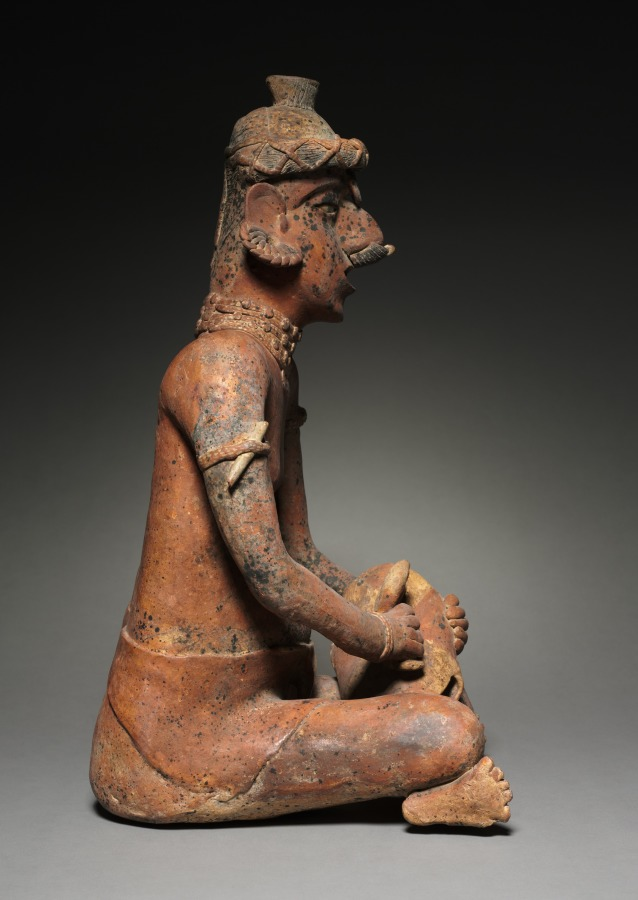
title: Male Seated Figure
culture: Mexico, Nayarit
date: 100 BCE–300 CE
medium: ceramic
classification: Ceramic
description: This couple-extremely fine examples of their kind-may commemorate the marriage of an important person, such as a chief, but could also represent siblings of a chiefly family. Whatever their relationship, their unity is conveyed by their physical similarities, including their jewelry, which marks high social station. The female is unusual in nursing an infant, likely a reference to generational renewal and the continuation of noble bloodlines. The significance of the male’s activity-beating a turtle-shell drum- is not understood.